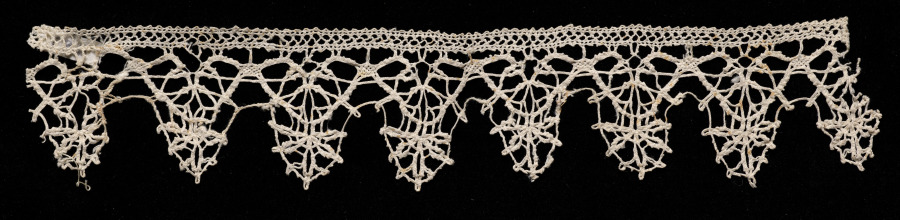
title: Lace Edging with Points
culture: Italy, Venice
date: 1500s–1600s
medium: Bobbin lace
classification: Lace